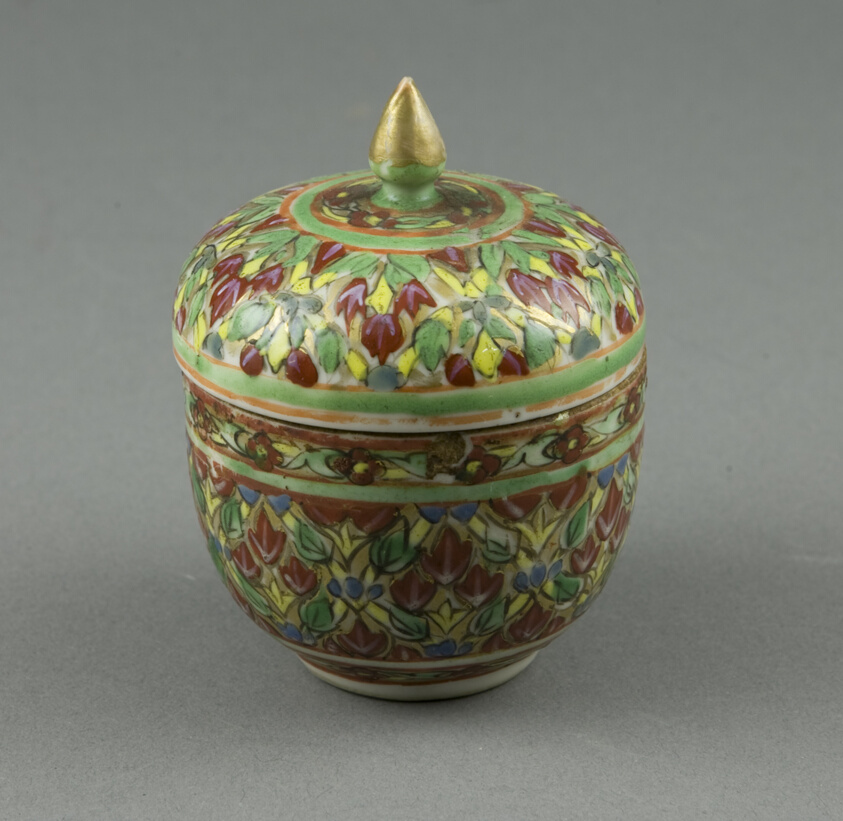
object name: Decorative Arts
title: Lai Nam Thong (Gold-Washed) Ware, Miniature Covered Jar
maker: China, for the Thai Market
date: 19th century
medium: Porcelain painted with gilt in overglaze polychrome enamels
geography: China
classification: porcelain; asian art; ceramics; decorative arts